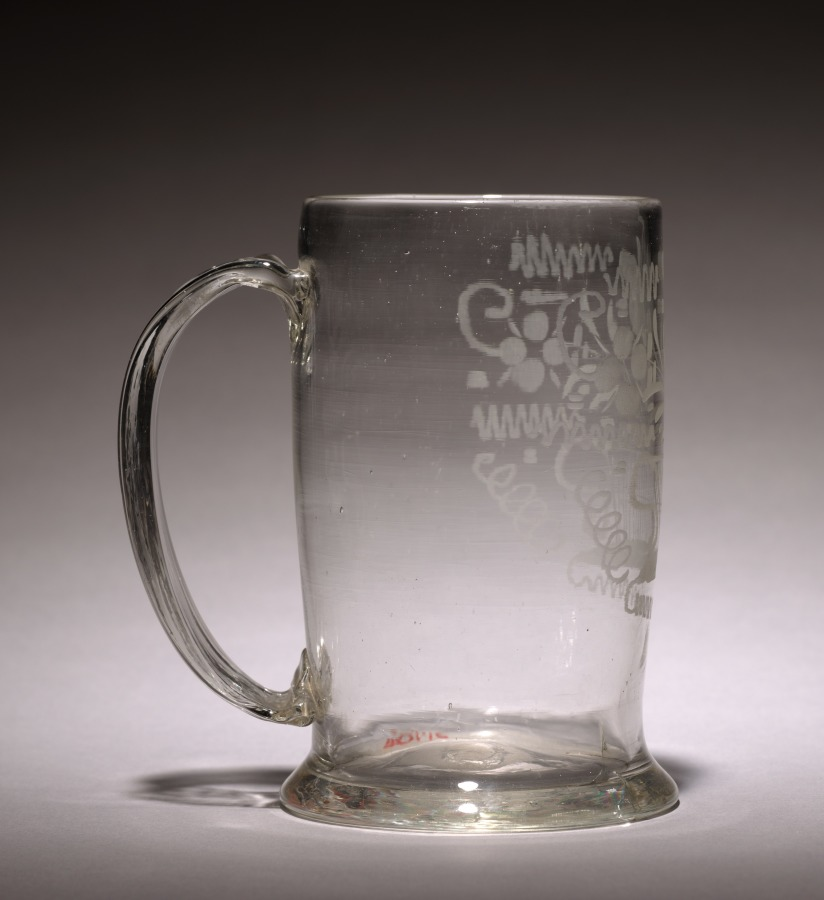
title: Handled Mug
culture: America, Stiegel Type, 18th century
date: 1700s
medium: glass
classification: Glass